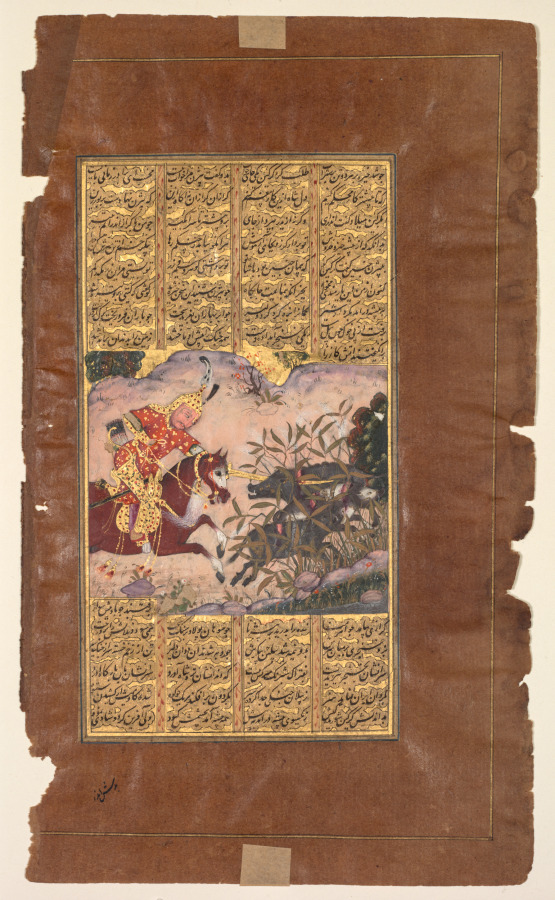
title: Bijan killing the wild boars of Irman, from a Shah-nama (Book of Kings) of Firdausi (Persian, about 934–1020) (verso)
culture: India, Bijapur, Deccan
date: c. 1610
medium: Gum tempera, ink, and gold on paper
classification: Painting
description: This illustrated page from a Shah-nama depicts the first adventure of the hero Bijan, son of an Iranian knight. When reports arrived at the king’s court of wild boars ravaging the borderlands between the enemy realms of Iran and Turan, Bijan volunteered to hunt and kill the beasts, much to the chagrin of his father, who doubted his young son’s ability to navigate the politically volatile situation. The fearless Bijan is shown on horseback as he singlehandedly strikes the bodies of the boars in the brush. After overzealously celebrating his success, Bijan must be rescued from a pit by Rustam. This early manuscript from the Deccan made for the sultan of Bijapur is characterized by glowing colors and lavish use of gold.